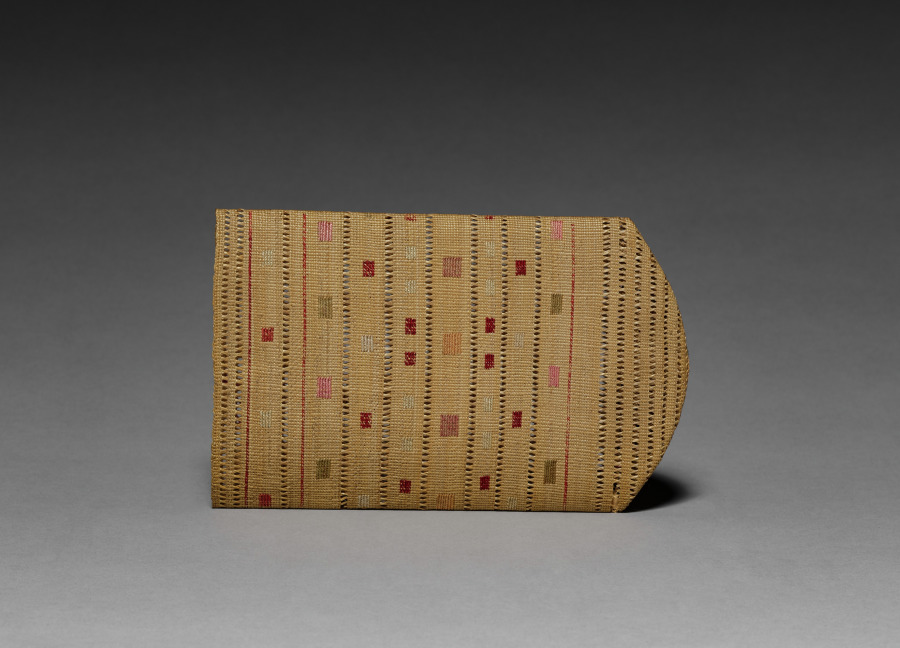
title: Cigarette or Needle Case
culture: Arctic, Aleut, Attu, Post-Contact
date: c 1875– 1917 (source unknown)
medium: plain-twined rye grass with crossed openwork, patterned twined start, intersecting layered spokes, and plaited finish; silk embroidery decorations (catalogue card)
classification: Basketry